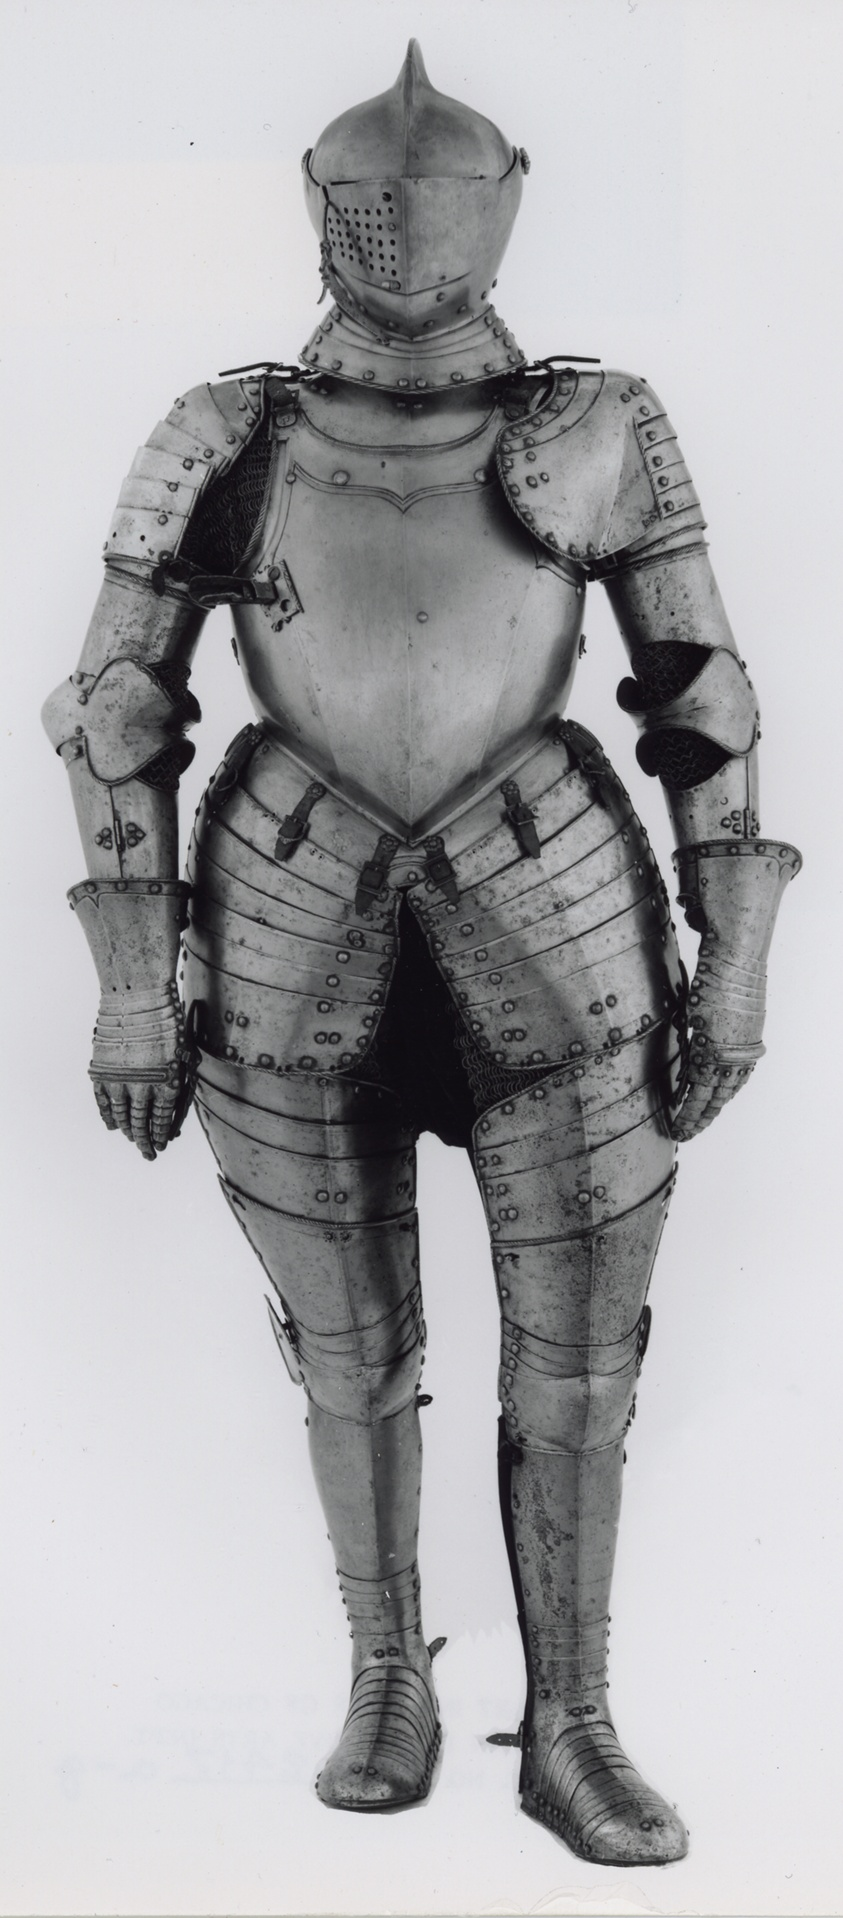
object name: Armor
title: Breastplate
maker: South German, Augsburg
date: c. 1580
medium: Steel, brass, and leather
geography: Augsburg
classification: suit; armor; arms and armor